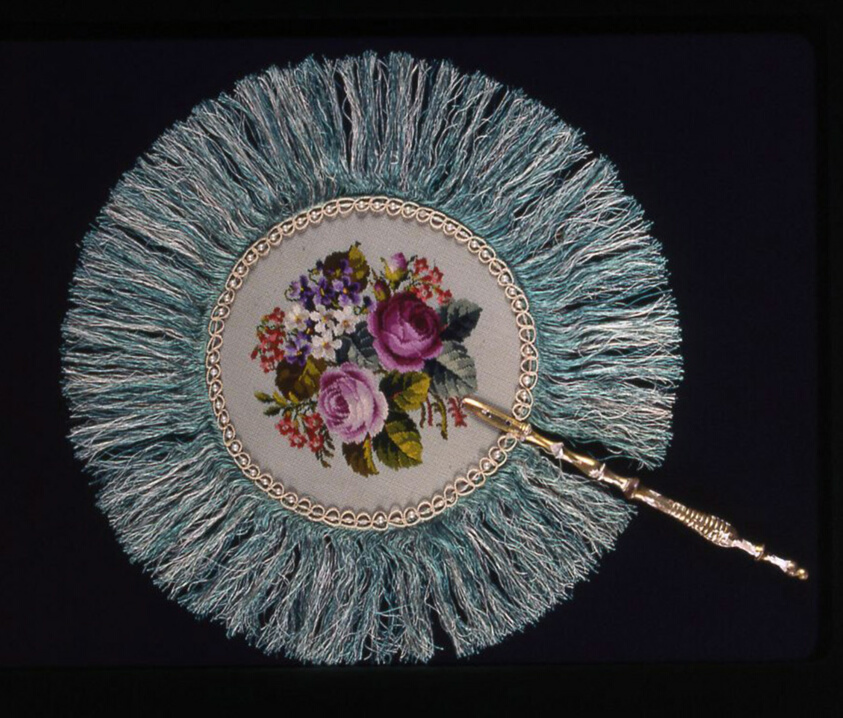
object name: Costume and Accessories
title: Pair of Fire Fans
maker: England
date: Late 19th century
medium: Round enamel metal screen embroidered with flowers, green and white silk fringe; gilt metal handles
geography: England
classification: textile; needlework (visual works); fan - needlework; embroidery; costume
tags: flowers